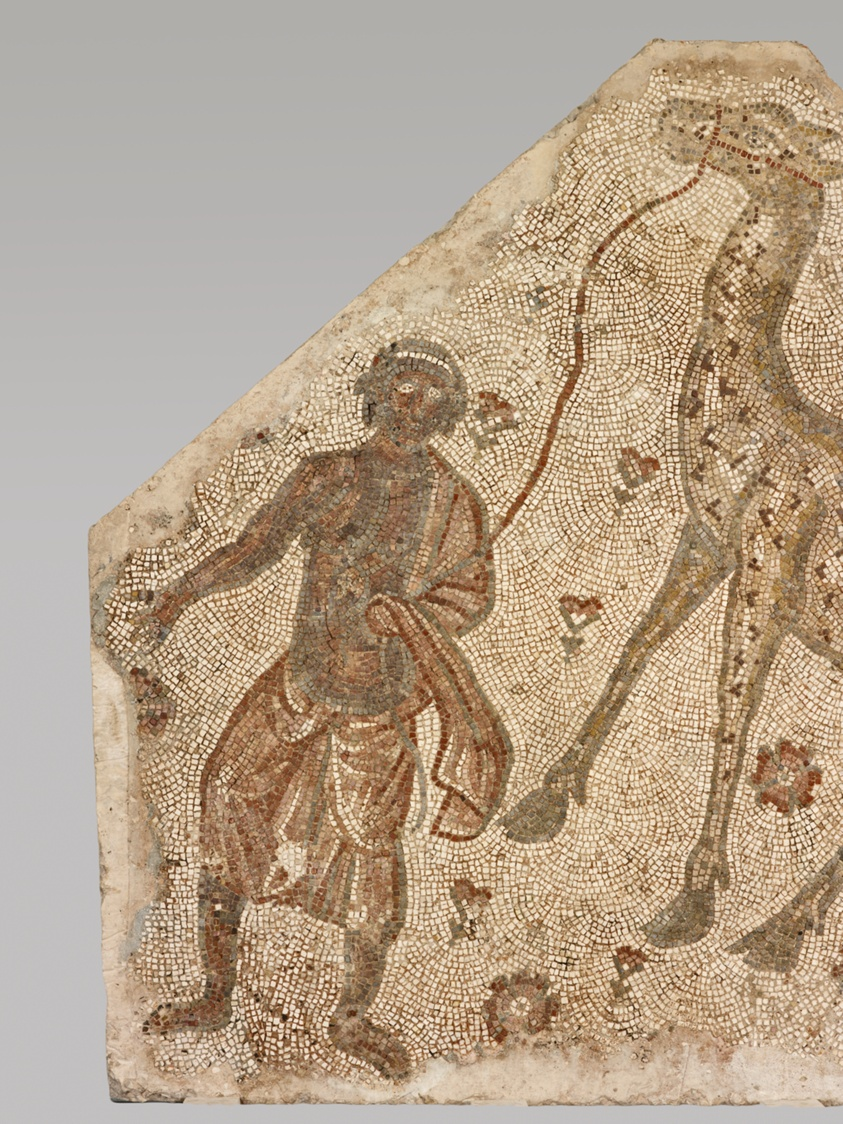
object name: Architectural fragment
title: Mosaic Fragment with Man Leading a Giraffe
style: byzantine, ancient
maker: Byzantine; Syria or Lebanon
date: 5th century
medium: Stone in mortar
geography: Tyre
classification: architectural fragment; mosaic; ancient art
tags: animals, men